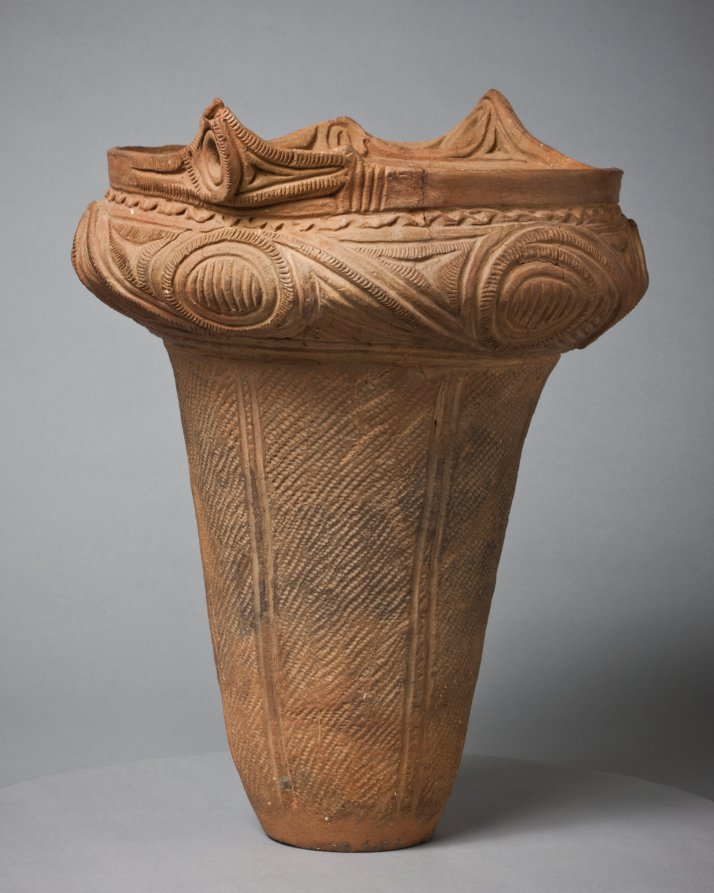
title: Urn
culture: Japan, Jōmon period (c. 10,500–300 BCE)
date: c. 2000 BCE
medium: earthenware, terracotta, impressed and incised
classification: Ceramic